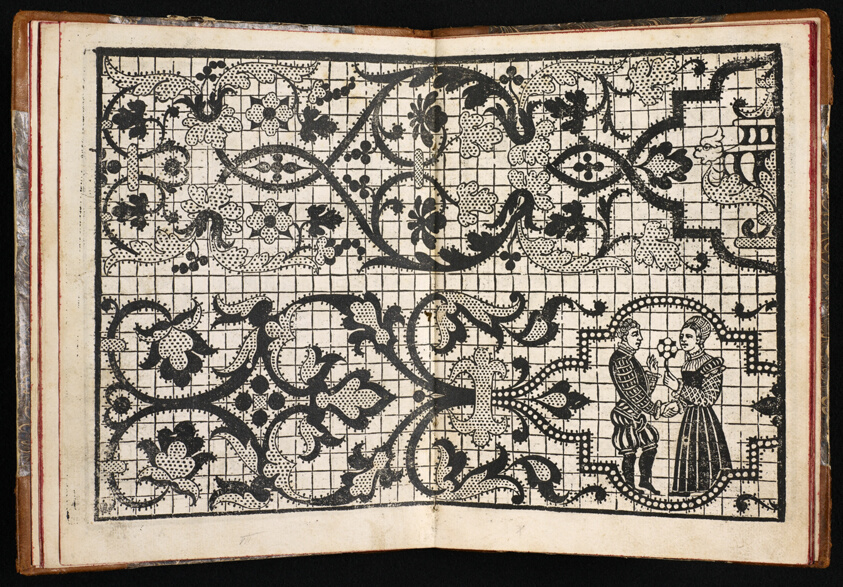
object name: Book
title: L'Honesto Essempio (The Accurate Example)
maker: Matthio Pagan (Italian, active 1538–1562); Italy, Venice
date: 1556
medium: Woodblock printed; 21 pages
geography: Venice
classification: textile; book; woodblock